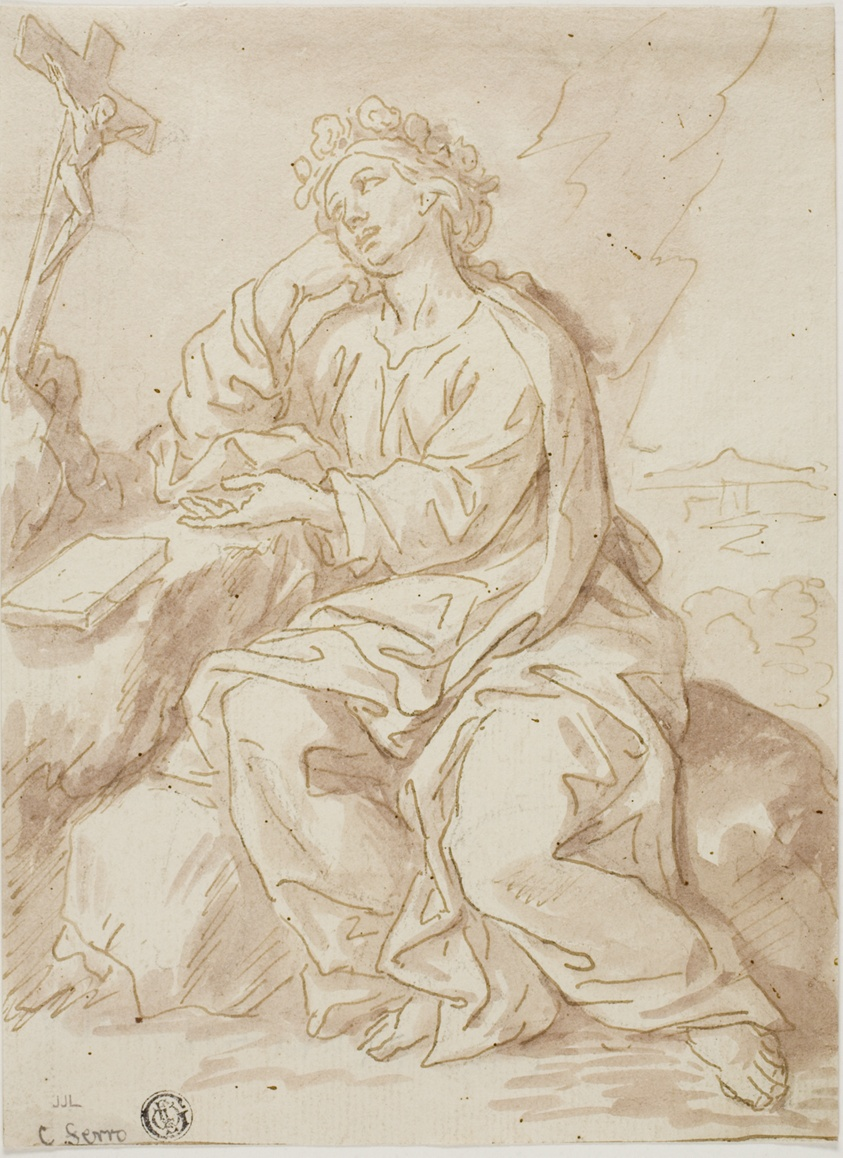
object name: Drawing and Watercolor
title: Saint Dorothy Praying in Desert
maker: Probably after Ciro Ferri; Italian, 1634-1689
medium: Pen and brown ink, with brush and brown wash, over black chalk, on ivory laid paper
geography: Italy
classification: pen and ink drawings; drawings (visual works); prints and drawing